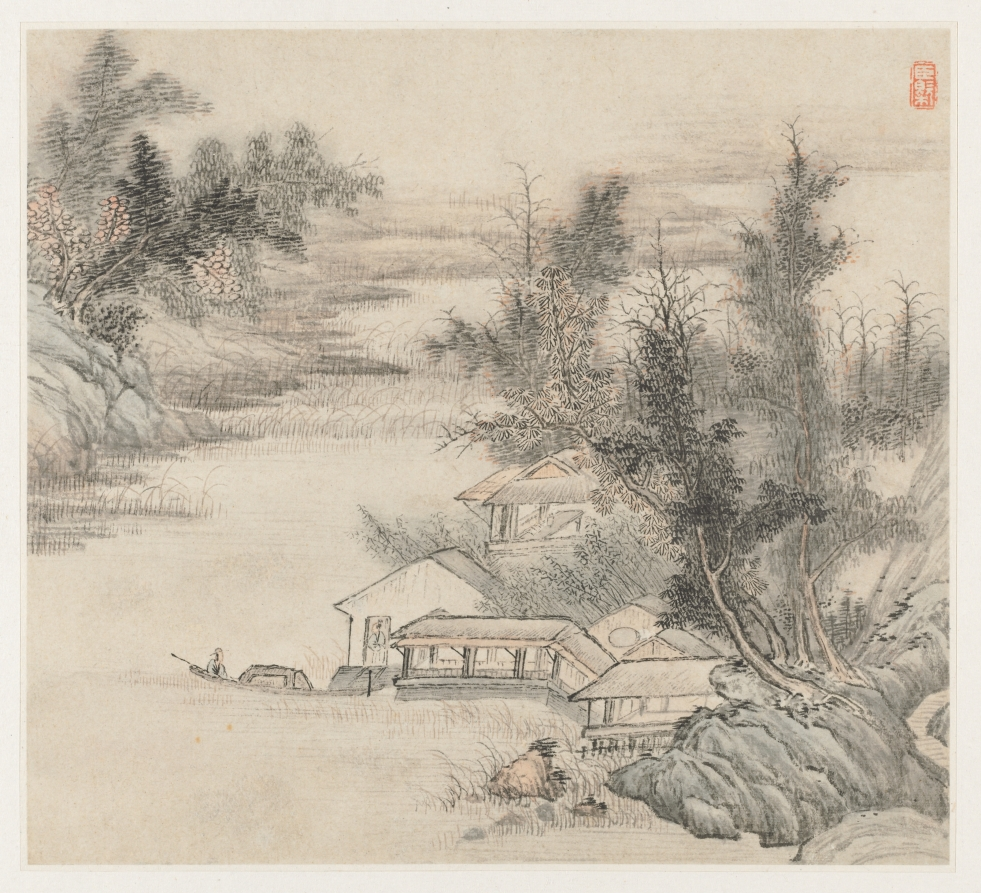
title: Album of Landscapes: Leaf 2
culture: China, Qing dynasty (1644-1911)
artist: Wang Gai (Chinese, active c. 1677–1705)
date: 1677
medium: album leaf, ink and light color on paper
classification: Painting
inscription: Poem by Wang Shih-chen